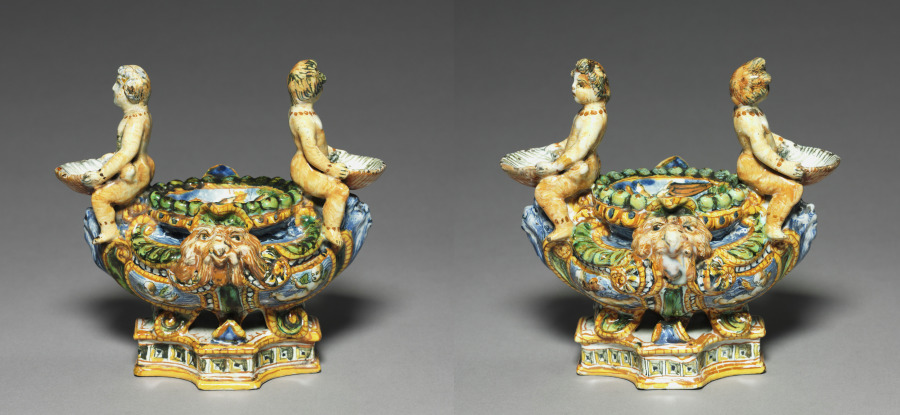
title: Pair of Saltcellars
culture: Italy, Urbino, 16th century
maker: circle of the Patanazzi Family (Italian)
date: c. 1570–90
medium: tin-glazed earthenware (maiolica)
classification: Ceramic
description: During the Italian Renaissance of the 1400s and 1500s, nobles and merchants eager to express their wealth and sophistication ordered ceramics for dining, display, and storage. Known as maiolica, because it resembled the brightly colored ceramics from the Mediterranean island of Majorca, these ceramic vessels were covered with a tin glaze that provided an opaque white surface on which colorful decoration could be painted.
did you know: During the Renaissance, salt was an expensive commodity and was used to both season and preserve food.